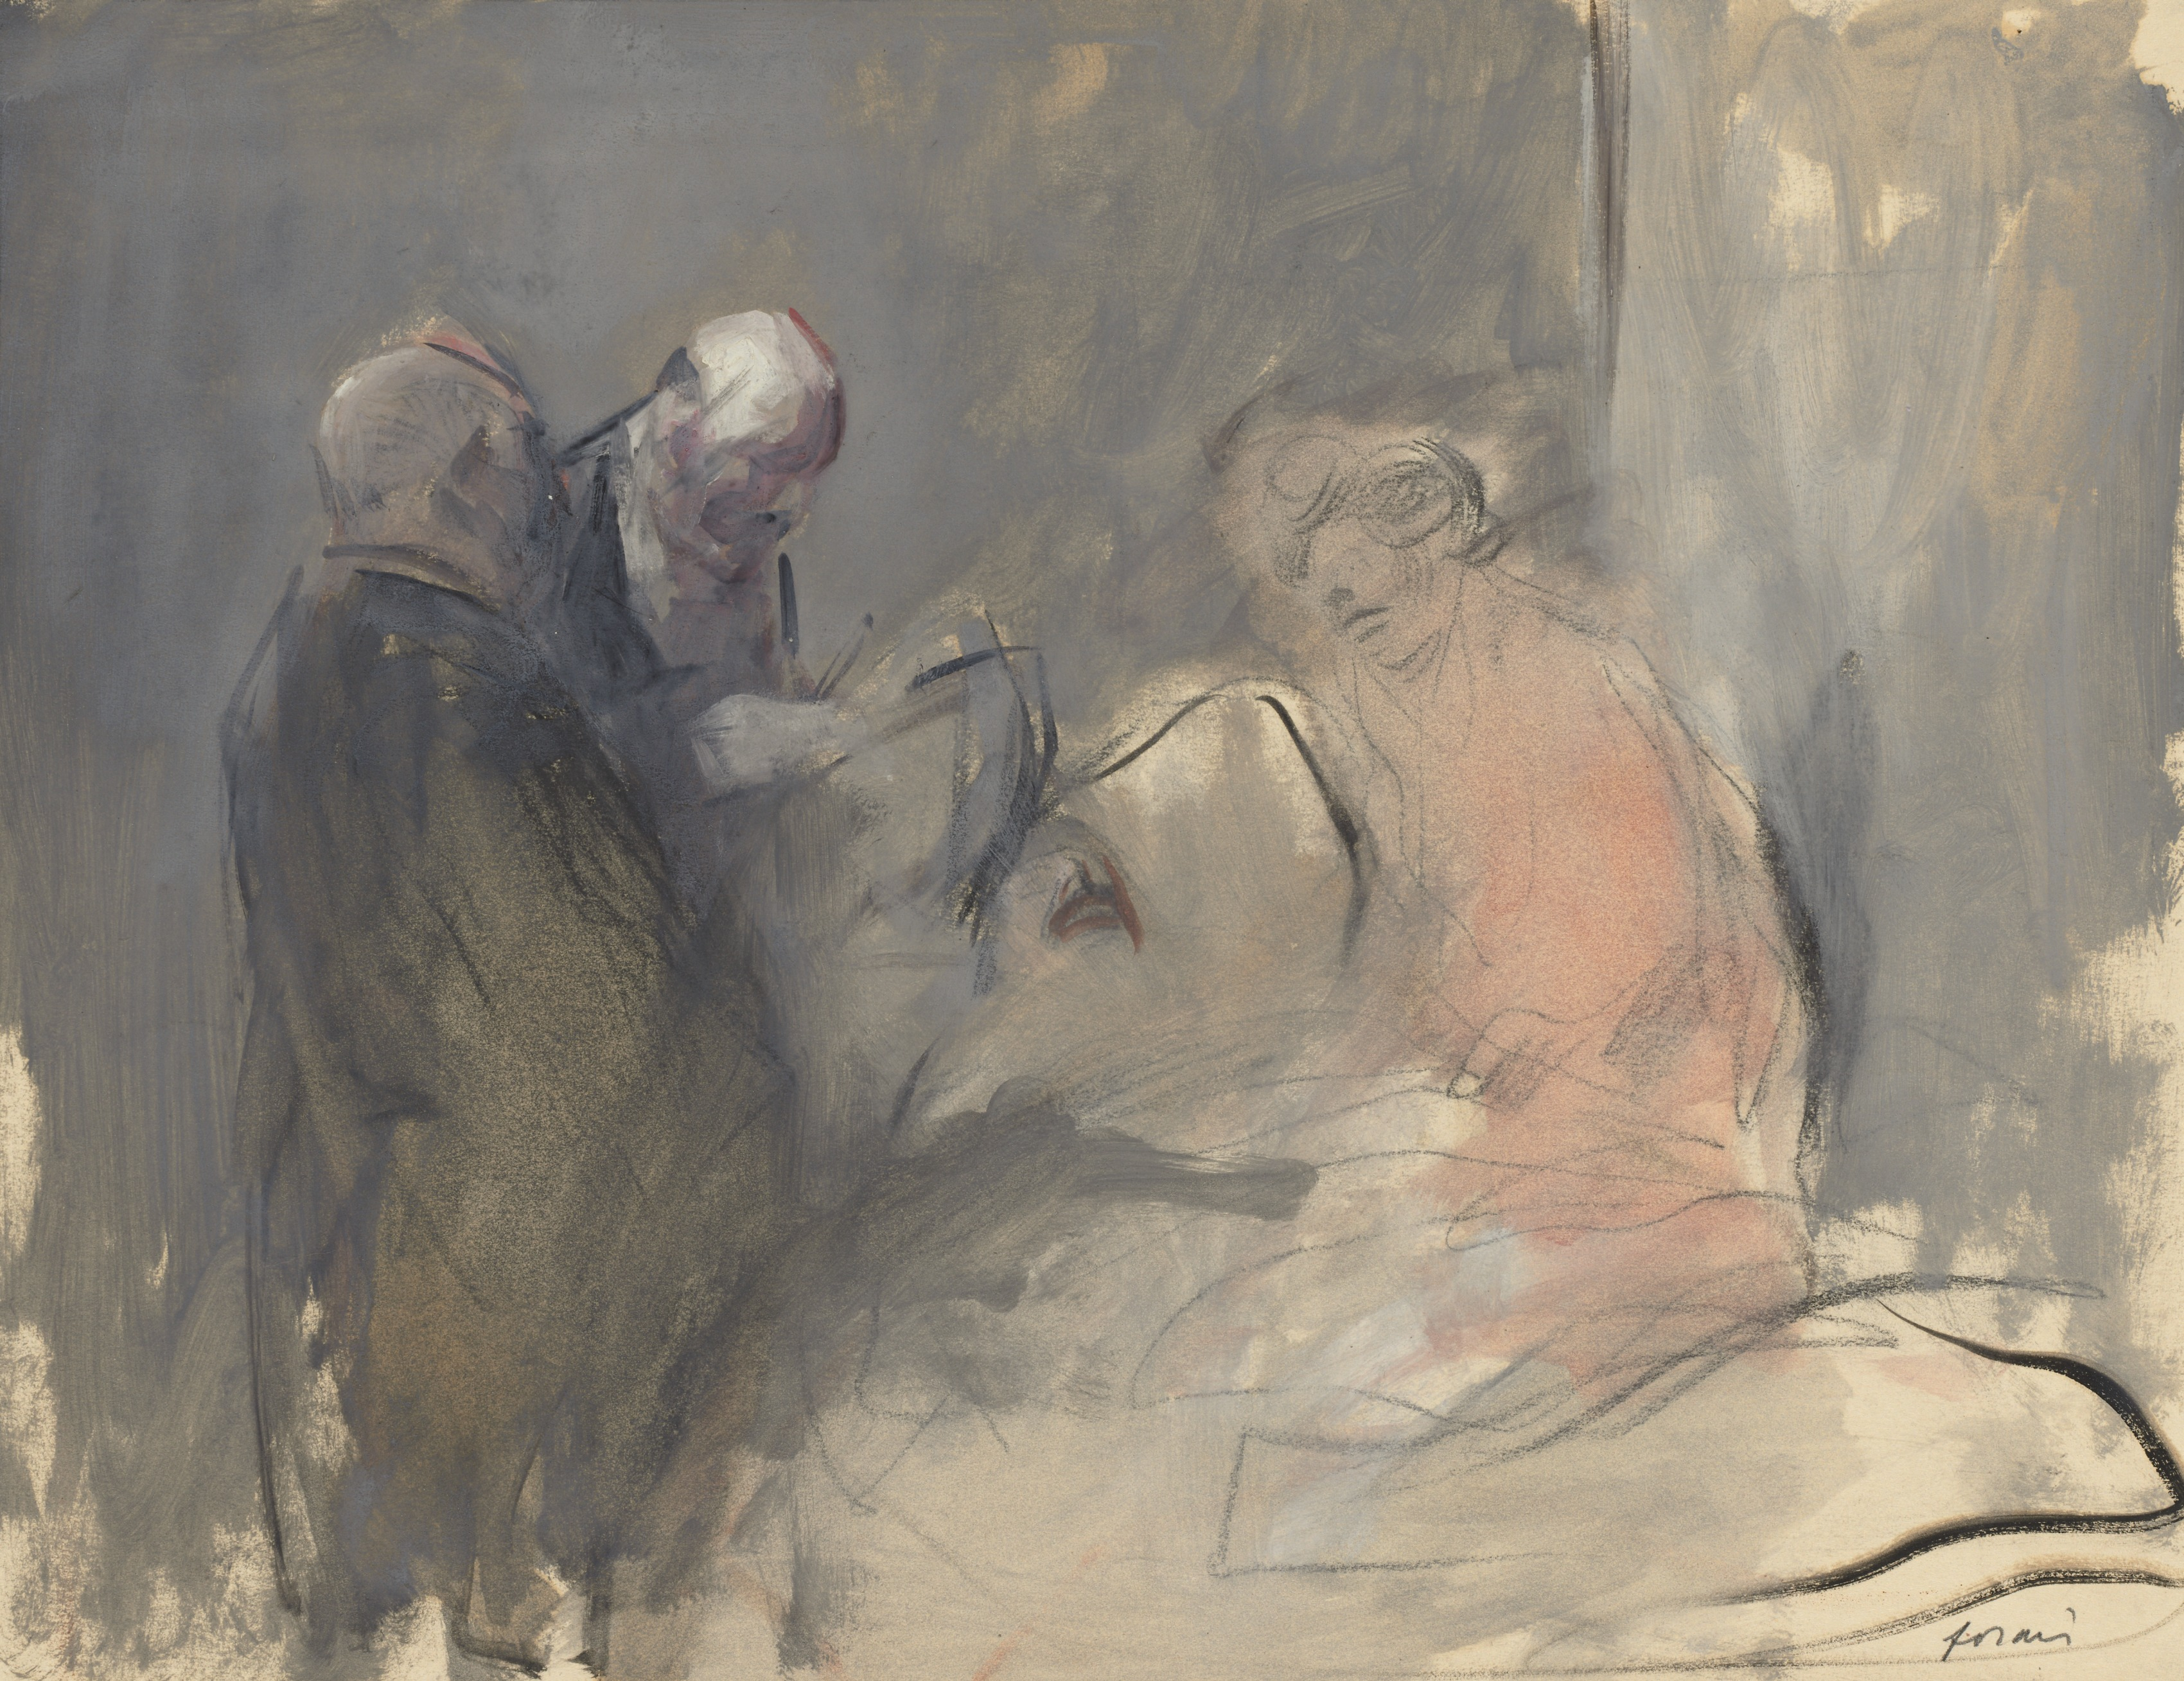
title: In the Hospital (recto) Sketch for In the Hospital (verso)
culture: France, late 19th-early 20th Century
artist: Jean Louis Forain (French, 1852–1931)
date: fourth quarter 1800s or first third 1900s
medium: watercolor and gouache over black crayon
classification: Drawing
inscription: signed, lower right, in graphite: forain ; lower left, in graphite: 61 ; lower right, in graphite: A 2334